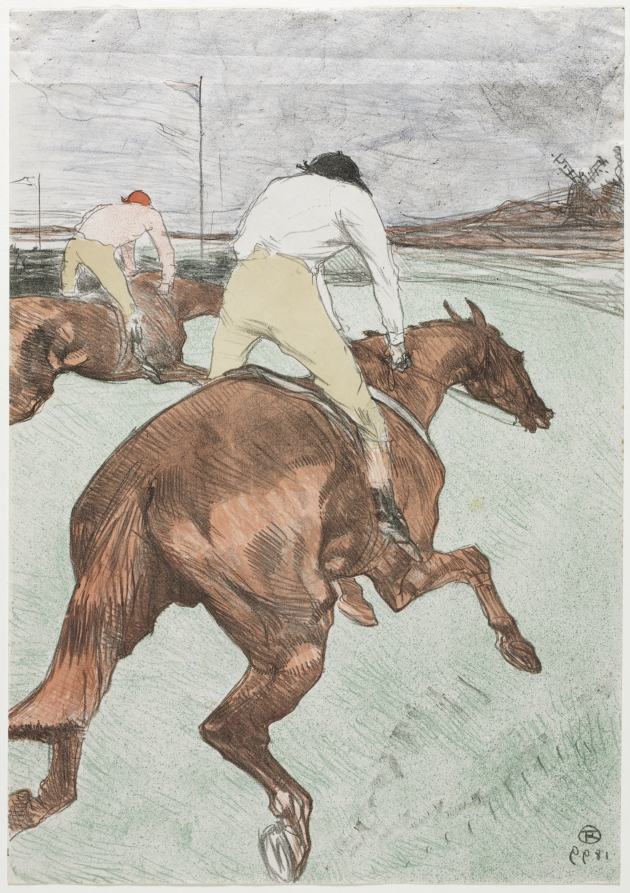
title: The Jockey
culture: France, 19th century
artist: Henri de Toulouse-Lautrec (French, 1864–1901)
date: 1899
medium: color lithograph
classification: Print